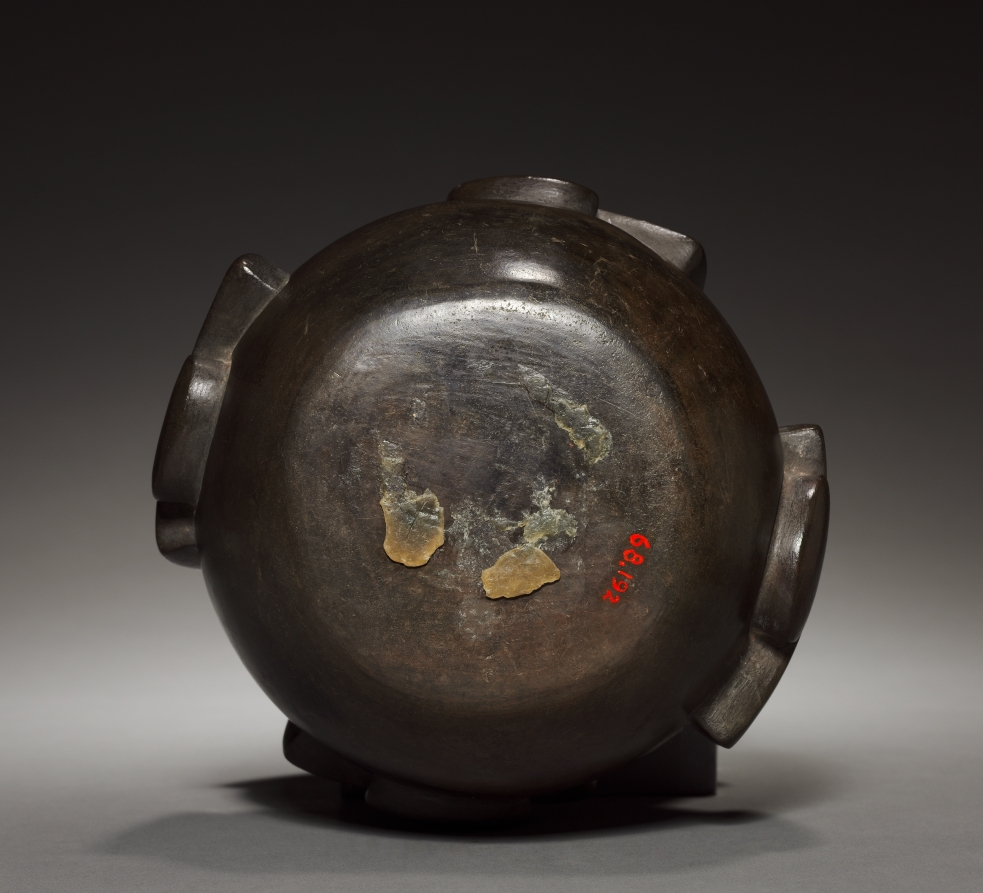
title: Vessel with Stirrup Spout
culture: Peru, likely modern, inspired by the Cupisnique style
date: 1900s (thermoluminescence date)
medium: earthenware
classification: Ceramic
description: The stirrup spout first appeared on the North Coast in the ceramics of the Cupisnique culture, a Chavín contemporary, and remained an important North Coast spout form until the time of the Spanish conquest. It probably had symbolic meaning, now lost.